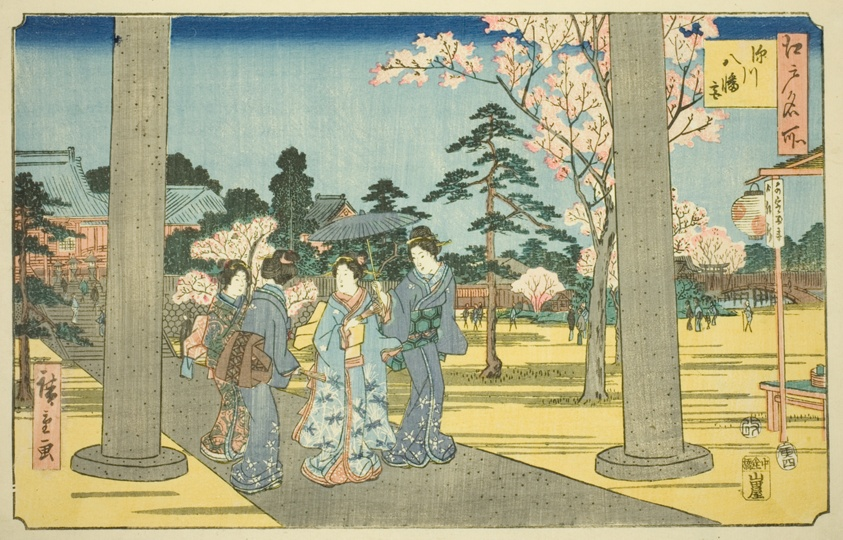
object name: Print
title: Fukagawa Hachiman Shrine (Fukagawa Hachimangu), from the series "Famous Places in Edo (Edo meisho)"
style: Japanese (culture or style)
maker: Utagawa Hiroshige 歌川 広重; Japanese, 1797–1858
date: 1854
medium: Color woodblock print; oban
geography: Japan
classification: woodblock print; print; asian art